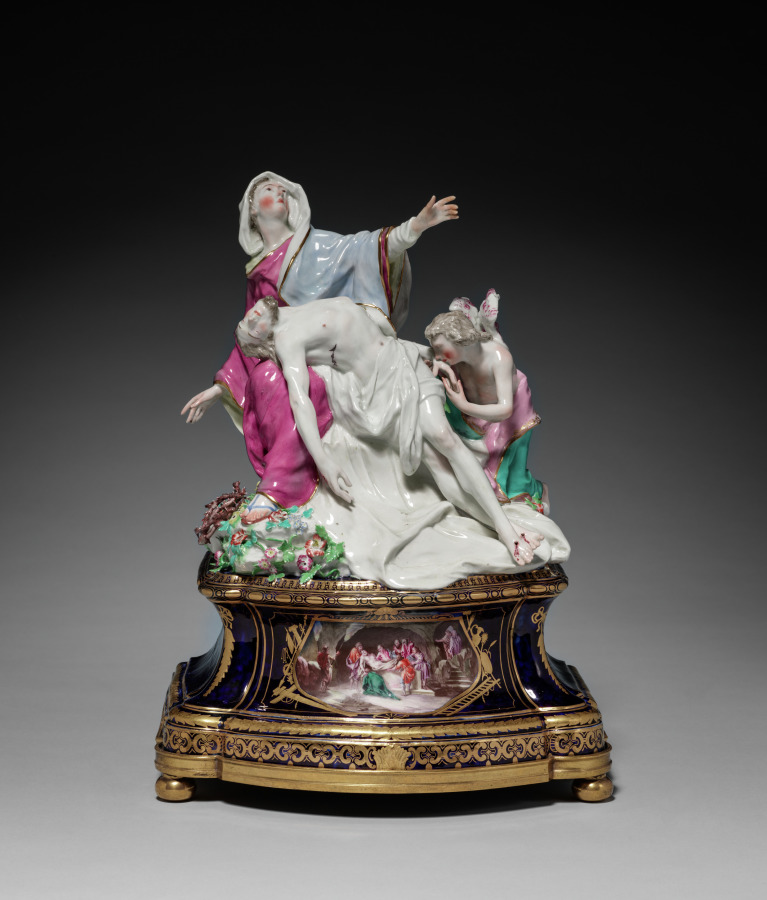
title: Figure of the Pietà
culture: England, London, Chelsea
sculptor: Joseph Willems (Flemish, 1715–1766)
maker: Chelsea Porcelain Factory (Britain, London, 1745–84)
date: c. 1761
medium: Soft-paste porcelain, painted in enamels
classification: Ceramic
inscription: Painted in gilt over the glaze at base of figure on the reverse: [a gold anchor]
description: The distinctively Roman Catholic subject of Mary cradling her son, the crucified Christ, suggests this figure was probably made for one of the aristocratic English families forced to practice their Catholicism in secret during the mid-1700s. Because of the laws banning Catholic worship in England, grand houses were often modified to include private chapels or rooms in private quarters where visiting priests delivered the sacraments in defiance of the laws favoring Protestant worship. A figure of this size and type likely would have served as an important devotional focal point within that context.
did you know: Only three examples of this figure by the Chelsea Porcelain Factory are known to exist.